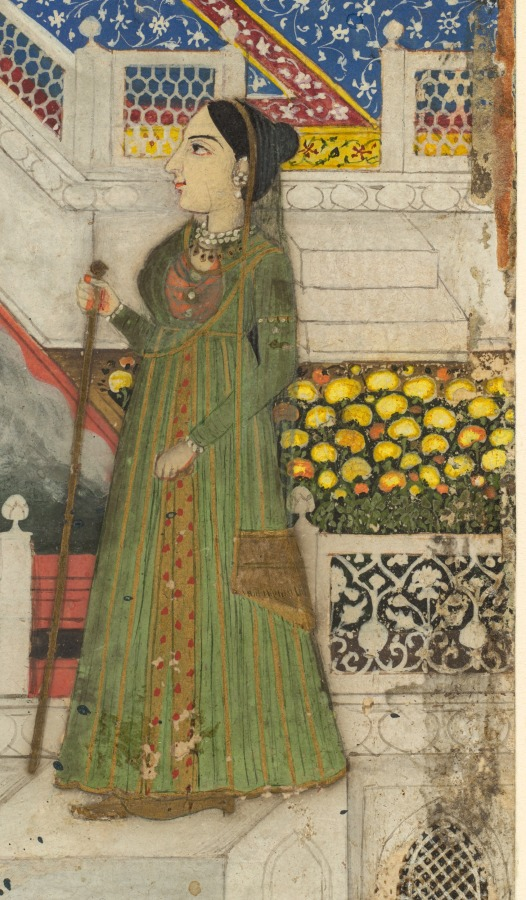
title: Women bathing before an architectural panorama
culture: India, Lucknow, Mughal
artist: Fayzullah (Indian, active c. 1730–1765)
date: c. 1765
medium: Gum tempera and gold on paper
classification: Painting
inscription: Persian inscription in center, on marble balustrade, in nasta‘liq script: The work of Fayzullah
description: Despite the wars waged and forts besieged in the background, life in the palace is carefree and luxurious. Some women enjoy hookahs and music on balconies, while others swim and drink liquor with abandon from Chinese porcelain cups and bottles. The artist has placed his name under the central pavilion, observing the scene across a formal garden of marigolds. The artist seems to have enjoyed experimenting with the idea of perspective, learned from European sources. He created a rapidly receding space that telescopes the view from the intimate harem quarters to the distant battlefields.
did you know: The artist signed his name below the king’s seat that overlooks the garden vista.